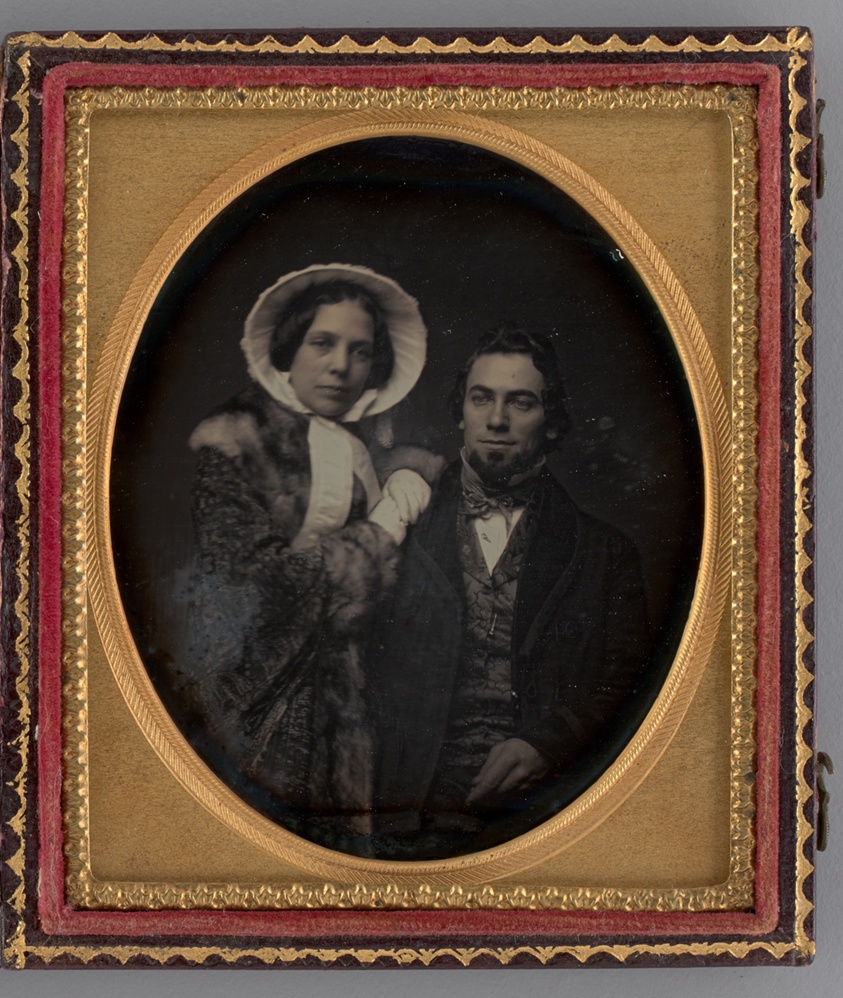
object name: Photograph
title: Untitled (Portrait of a Woman and a Man)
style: 19th century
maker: Unknown maker; American, 19th century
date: 1854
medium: Daguerreotype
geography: United States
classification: portrait; photograph; photographic process; photography; portrait; daguerreotype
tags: lundberg collection, portraits: multiple subjects, portrait, Male, female, couples, portraits